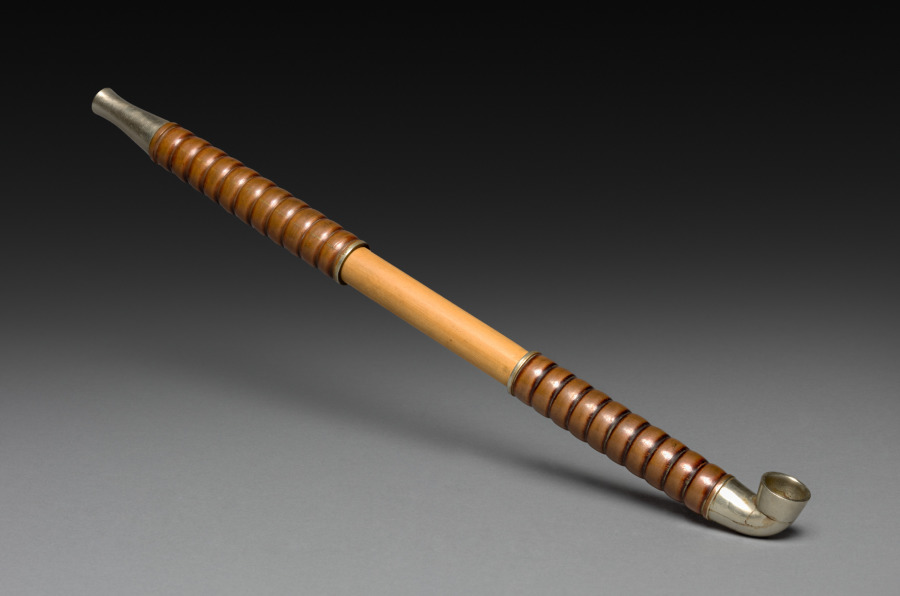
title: Tobacco Pipe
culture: Japan, Meiji period (1868–1912)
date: late 1800s–early 1900s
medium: bamboo, metal, silver/brass alloy, and copper (?)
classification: Miscellaneous